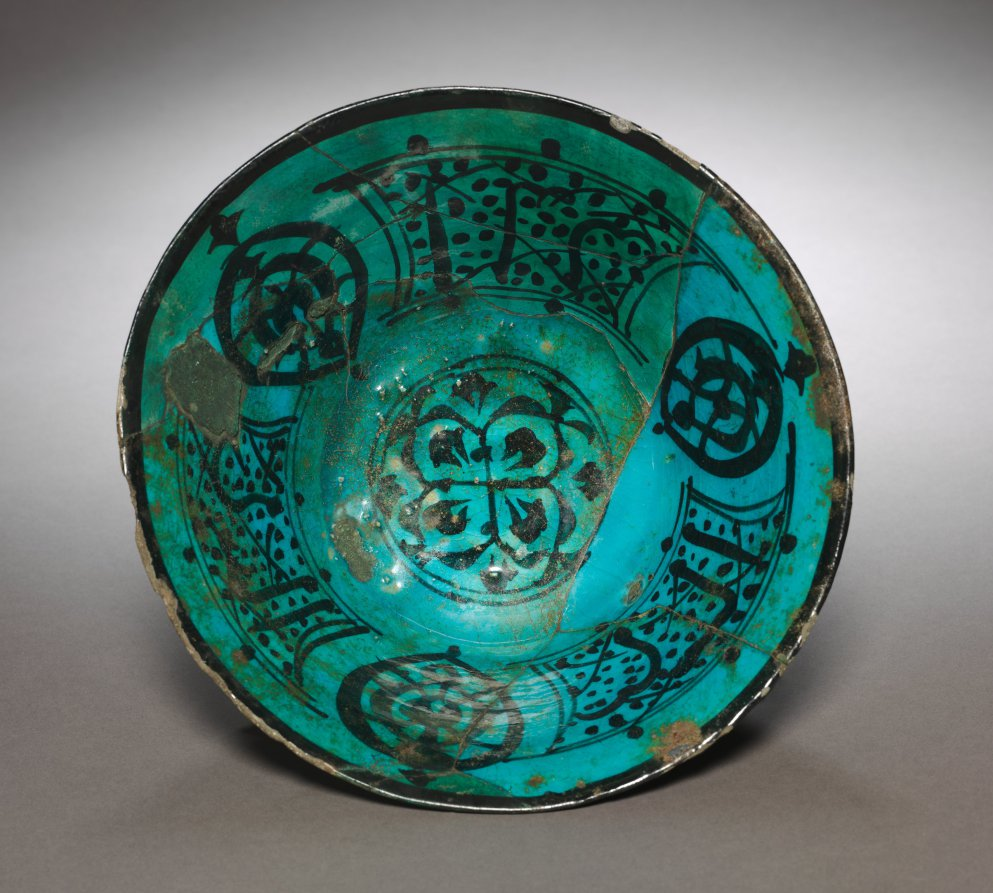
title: Bowl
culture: Syria (Raqqa), Ayyubid Period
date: early 1200s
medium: fritware with underglaze-painted design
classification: Ceramic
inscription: Squarish panels on inside each contain the same word, in a clumsy naskh script: it appears to read "al-baraka" Arabic for "the blessing."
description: This fritware bowl has wide flaring sides and a high foot. The decoration on the inside consists of a four-lobed device at center, surrounded by two circles. The inside walls carry a three-part design, with three oval motifs alternating with three squarish panels. Each panel contains an Arabic word.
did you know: The inside of the bowl contains saggar spurs.